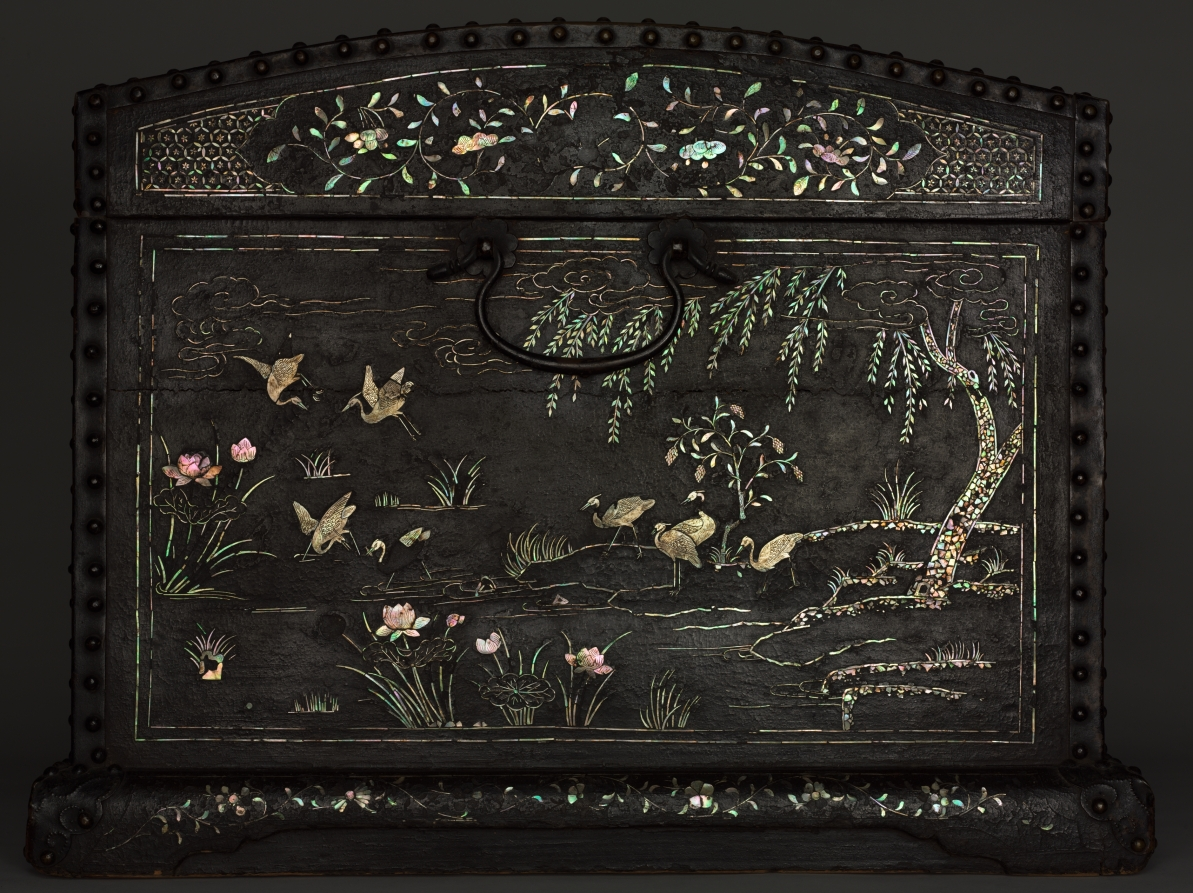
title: Chest for Storing Garments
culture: China, Ming dynasty (1368–1644)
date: 1400s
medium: lacquered wood with mother-of-pearl inlay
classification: Lacquer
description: This precious lacquer box is decorated with bird and plant motifs and figures in mother-of-pearl inlay. The decoration depicts the leisurely pursuit of scholars in nature and a garden setting. Scholars play the board game weiqi, have philosophical conversations, pluck a qin (a zither-like instrument with strings), and read books. Lacquer chests of this type were used to store garments neatly folded along their straight seams. The mother-of-pearl inlay from shells is a technique that was typically practiced by craftsmen in Hangzhou and other parts of southeast China near the sea.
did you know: Lacquer chests of this type were used to store garments.